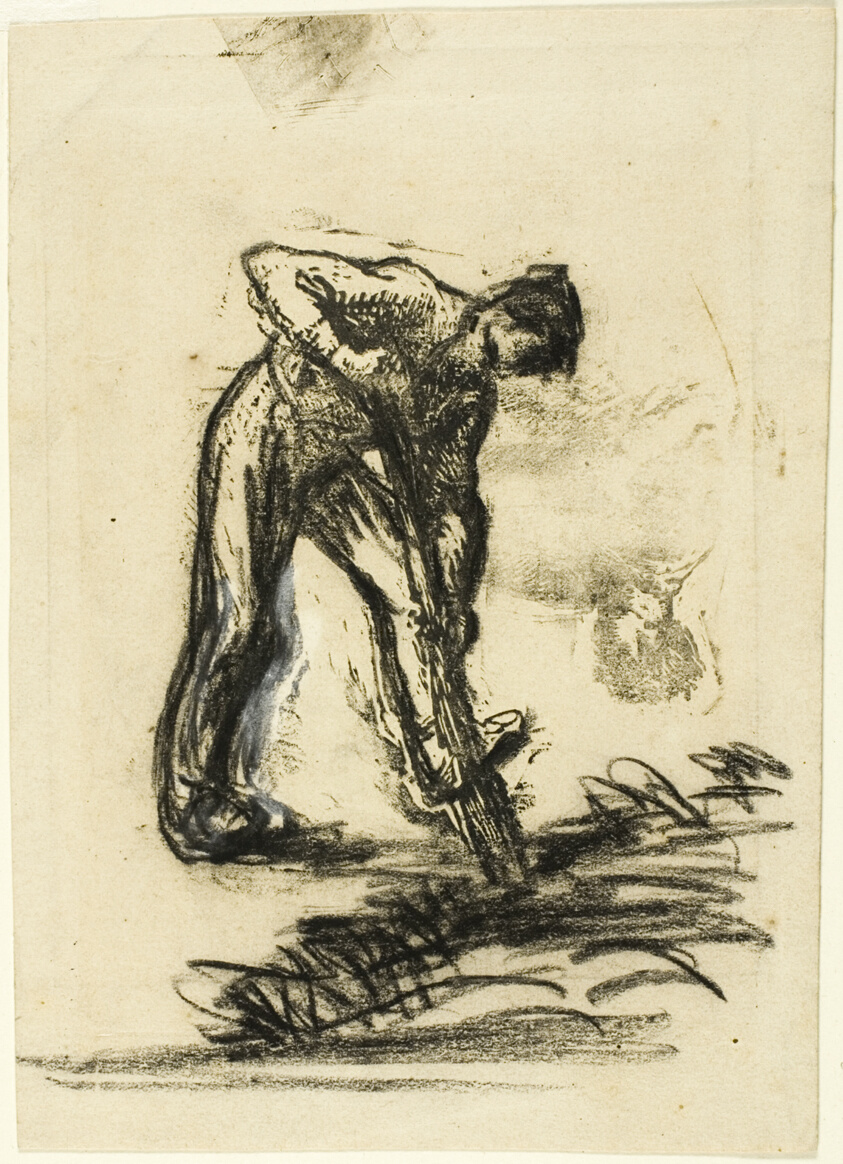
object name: Print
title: Peasant Digging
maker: Jean François Millet (French, 1814-1875)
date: 1863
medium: Woodcut in black, retouched with charcoal and Chinese white on buff wove paper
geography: France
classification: woodcut; print; prints and drawing